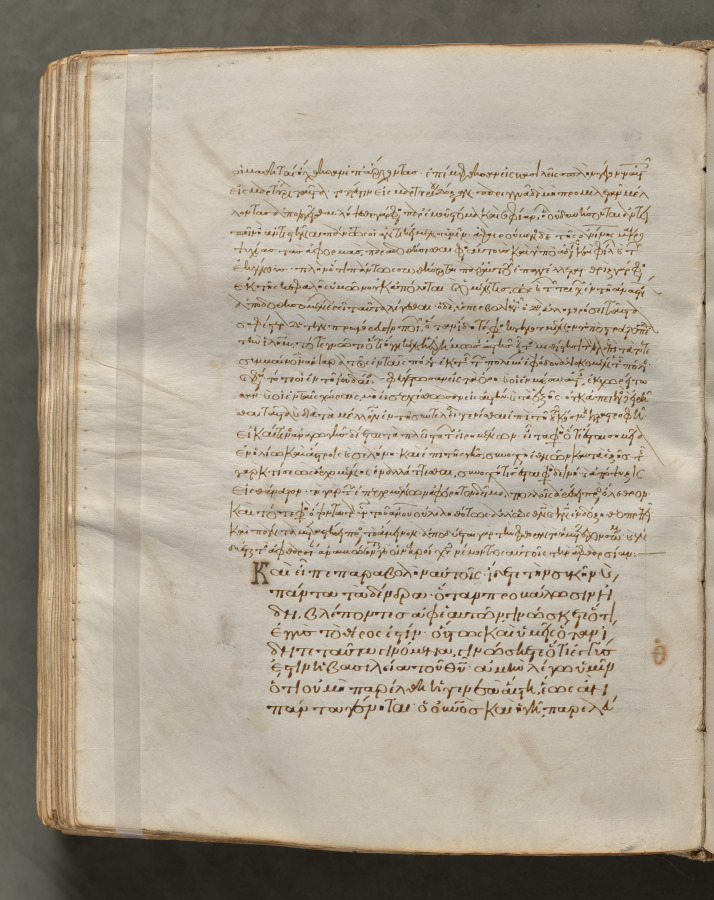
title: Text, folio 305 (verso), from a Gospel Book with Commentaries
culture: Byzantium, Constantinople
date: c. 1000–1100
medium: ink, tempera, and gold on vellum; leather binding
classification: Bound Volume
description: Each of the four gospels in this book opens on a page with brilliantly illuminated borders depicting the author of the text as well as birds—principally peacocks, symbols of the immortality of the soul—and fountains, representing the fountain of life and the salvation of the soul. This volume consists of 428 leaves with texts in Greek. Its level of sophistication suggests that it was probably written and decorated in a monastery in Constantinople.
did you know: Gospel books were carried in procession through Byzantine churches.